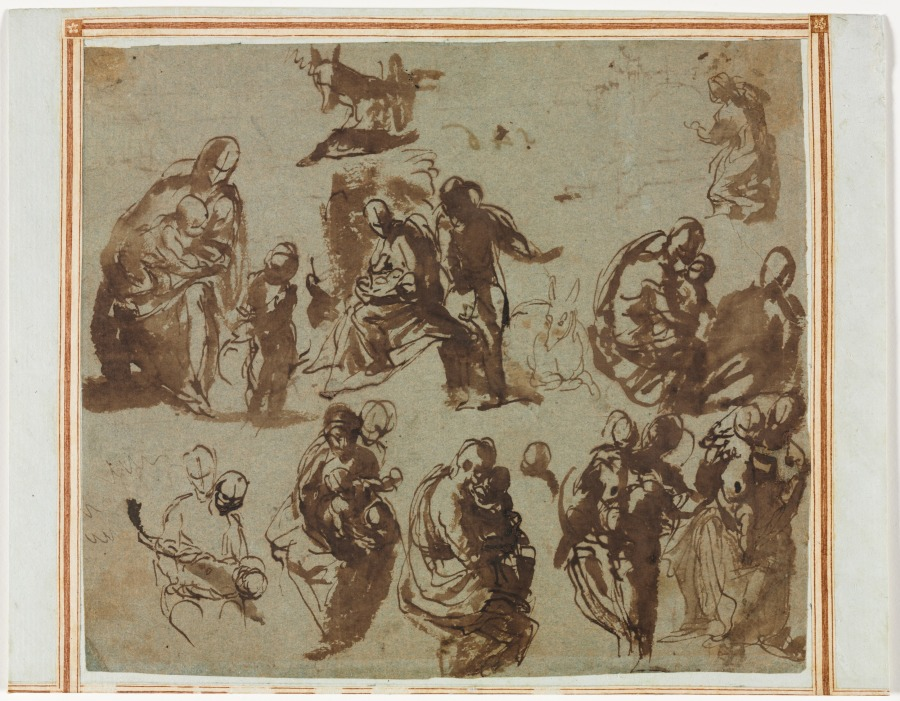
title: Various Sketches of the Madonna and Child (recto)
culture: Italy, Venice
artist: Paolo Veronese (Italian, 1528–1588)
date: c. 1580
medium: pen and brown ink (iron gall) and brush and brown wash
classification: Drawing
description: In the last decades of his career, Paolo Veronese and his workshop produced a number of idyllic visions of the Holy Family in repose in the countryside during their flight into Egypt. This crowded sheet of loose, lively sketches was recently proposed to have inaugurated an intensive period of interest in this subject that began around 1570. The sheet shows two horizontal rows with eight versions of the seated Virgin holding the Christ Child, in some of the sketches accompanied by the infant John the Baptist or Joseph, and in one by a donkey. The sheet presents an unusual case of being preparatory not for paintings, but for finished chiaroscuro drawings, now in London, Berlin, and Cambridge, MA. While the individual sketches may appear at first glance a mass of tangled lines and confused forms, such pen and ink drawings demonstrate the Venetian artist's restless creative energy.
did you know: The sheet of paper was a more vibrant, pure blue when the drawing was made; aging has rendered the color of the sheet closer to a green-gray.